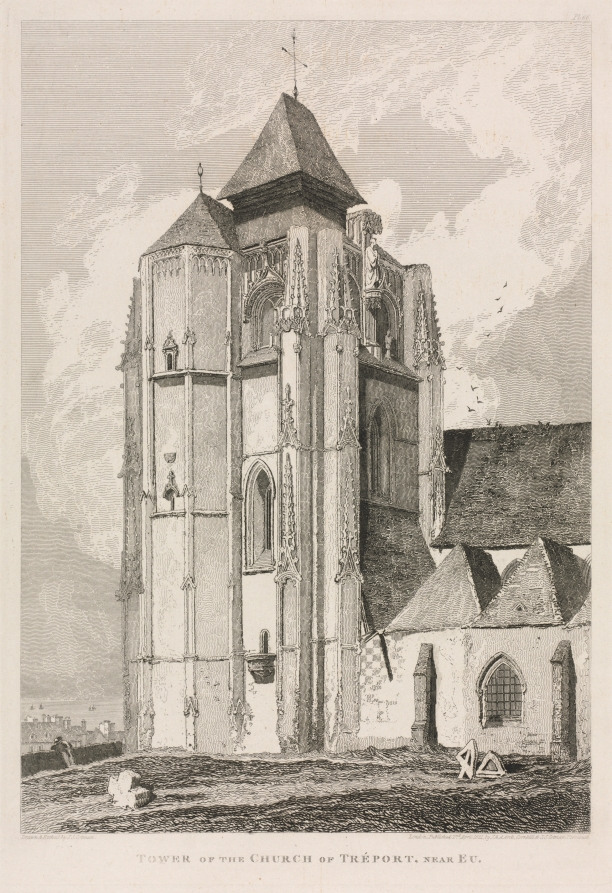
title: Architectural Antiquities of Normandy (Vol. II), Pl. 66: Tower of the Church of Tréport, near Eu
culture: England, 19th century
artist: John Sell Cotman (British, 1782–1842)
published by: J & A Arch, Cornhill & J.S. Cotman, London 1821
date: 1821, published 1822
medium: softground etching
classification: Print